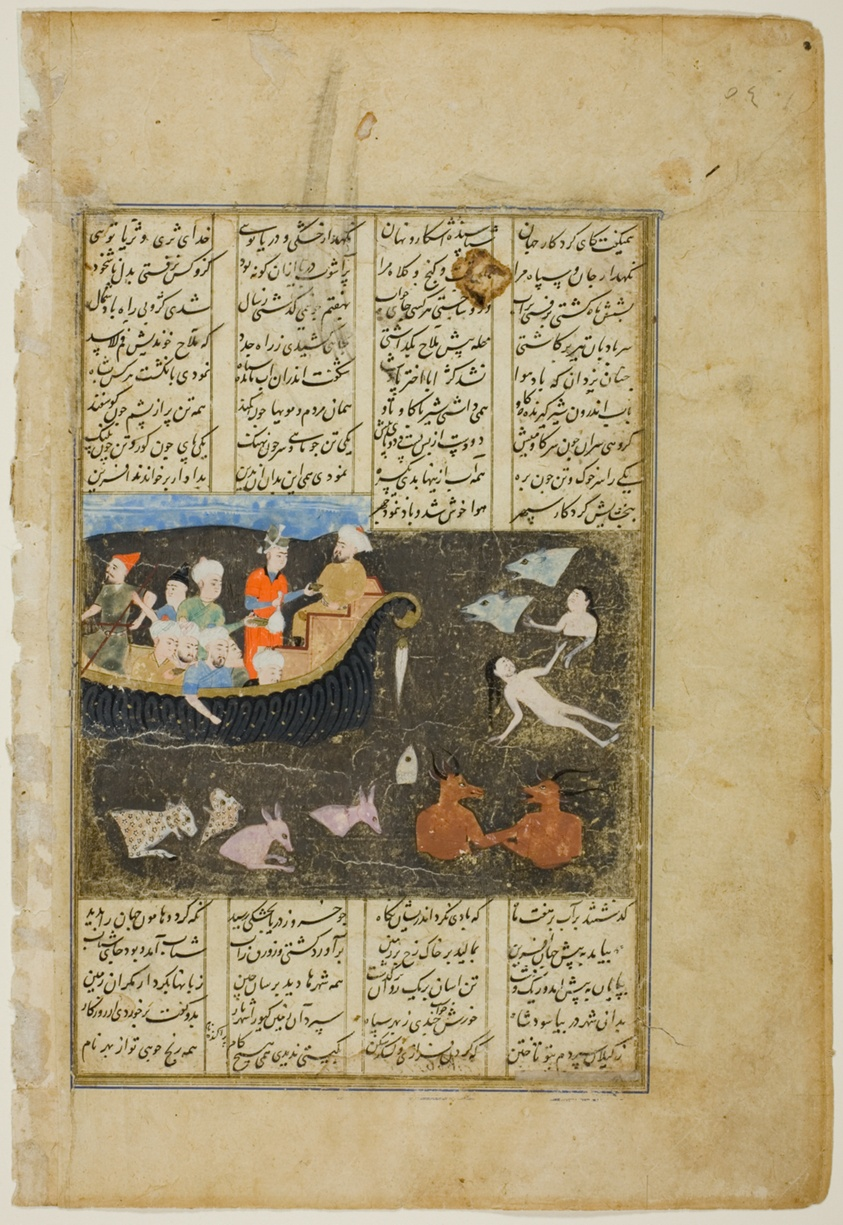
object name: Painting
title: Kay Khosrow Crosses the Sea of Zareh on His Way to China, a scene from the Shahnama of Firdausi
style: Islamic (culture or style), safavid, Islamic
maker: Iran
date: Safavid dynasty (1501–1722), about 1550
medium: Watercolor and ink on paper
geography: Iran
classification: miniature painting; persian; iran; painting; asian art; islamic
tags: iran, shahnama, persia, firdausi